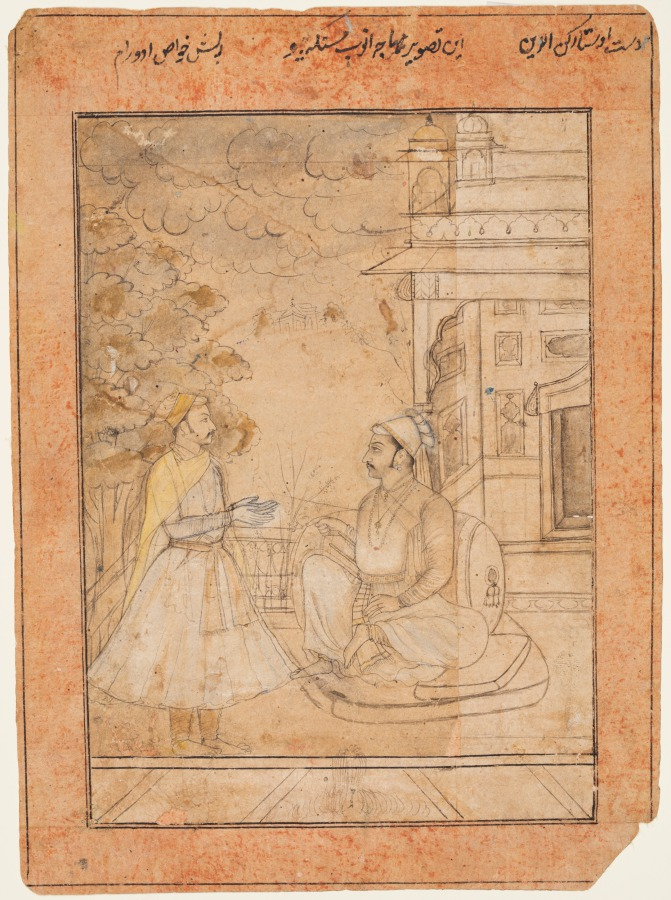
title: Maharaja Anup Singh of Bikaner (reigned 1669–98) Receives a Courtier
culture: Northwestern India, Rajasthan, Rajput Kingdom of Bikaner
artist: Ruknuddin (Indian, active c. 1666–97)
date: c. 1690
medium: Ink and gum tempera on paper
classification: Painting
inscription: Top: in Persian: 'dast-i ustā rukn al-dīn’ ‘eīn tasvīr māhārājā anūp siṃgh jīva’ ‘rabsh (?) khvās ado rām’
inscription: Verso: in Nagari: 'dastakata uste rukanadīna jī rā chai’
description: Ruknuddin is one of the most celebrated artists of the Bikaner painting atelier. His exquisite mastery of brushwork and portraiture can be noted even in the spontaneity of an informal study. From the same illustrious family of Bikaner artists, he was a second cousin of Nur Muhammad, who created the portrait drawing of Maharaja Rai Singh of Bikaner (1987.1100).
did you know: Areas of white indicate places where Ruknuddin made corrections; the king’s right foot, for example.